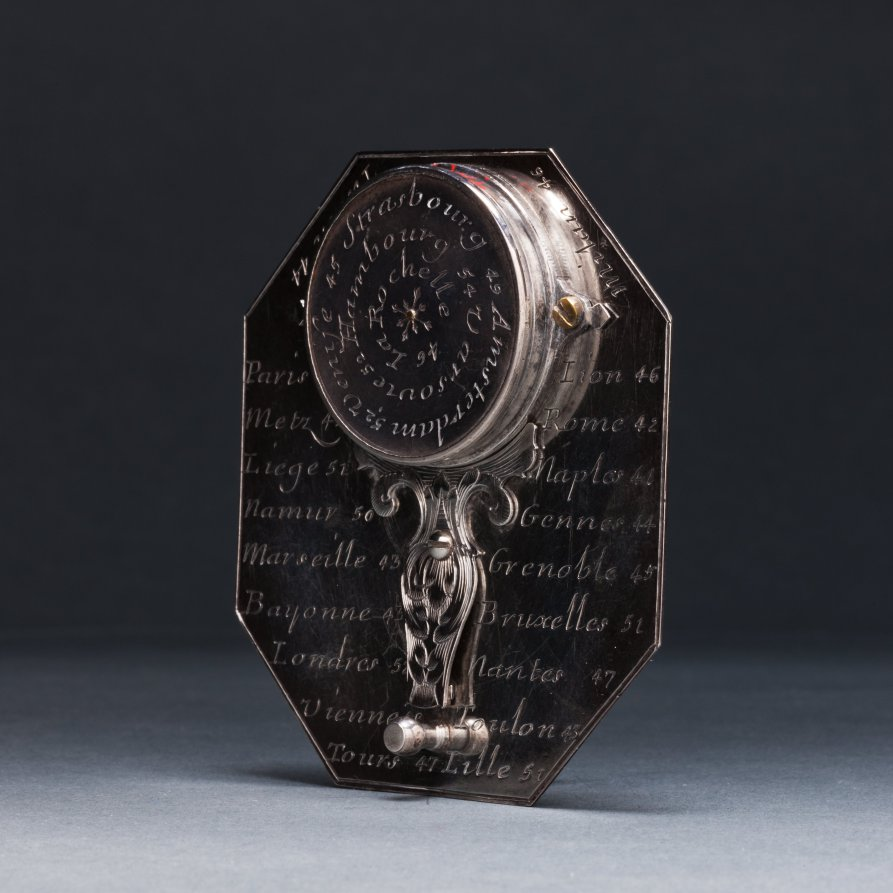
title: Butterfield Sundial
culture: France, 18th century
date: 1700s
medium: silver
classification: Silver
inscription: [Engraved signature above the compass in ribbon band]: "N. BION A Paris"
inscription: [Engraved on the face of the sundial]: “Pour 55° 4-5-6-7-8-9-10-11 50° IIII-V-VI-VII-VIII-IX-X-XI 45° 5-6-7-8-9-10-11 40° -VI-VII-VIII-IX-X-XI'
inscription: [Engraved on the other side]: "Pour 55° -8-7-6-5-4-3-2-1-0 50°-VIII-VII-VI-V-IIII-III-II-I 45°-8-7-6-5-4-3-2-1 40°-VII-VI-V-IIII-III-II-I"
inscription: [Engraved around the compass]: “NORD-OUEST-SUD-EST”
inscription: [Engraved on the back of the sundial]: “Turin 44 Milan 46 Paris 49 Lion 46 Metz 49 Rome 42 Liege 51 Naples 44 Namur 50 Gennes 44 Marseille 43 Grenoble 45 Bayonne 43 Bruxelle 51 Londres 52 Nantes 47 Vienne 48 Toulon 43 Tours 47 Lille 51”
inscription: [Engraved around the back of the compass]: “Venise 45 Strasbourg 49 Amsterdam 52 Hambourg 54 Varsovie 52 La Rochelle 46”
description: Butterfield-type sundials are characterized by their adjustable gnomons, metal flaps that cast a shadow on the dial’s face to indicate the hour, and geographical indices. This sundial has a scale adjustable between latitudes of 40° to 60° north. The latitudes of 26 European towns are engraved on its back for quick reference. With an intricately engraved silver face, it would have functioned as a fashionable traveler’s accessory.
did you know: Butterfield-style sundials were named after Micheal Butterfield, an English scientific and mathematical instrument maker who worked in Paris between 1674 and 1724.